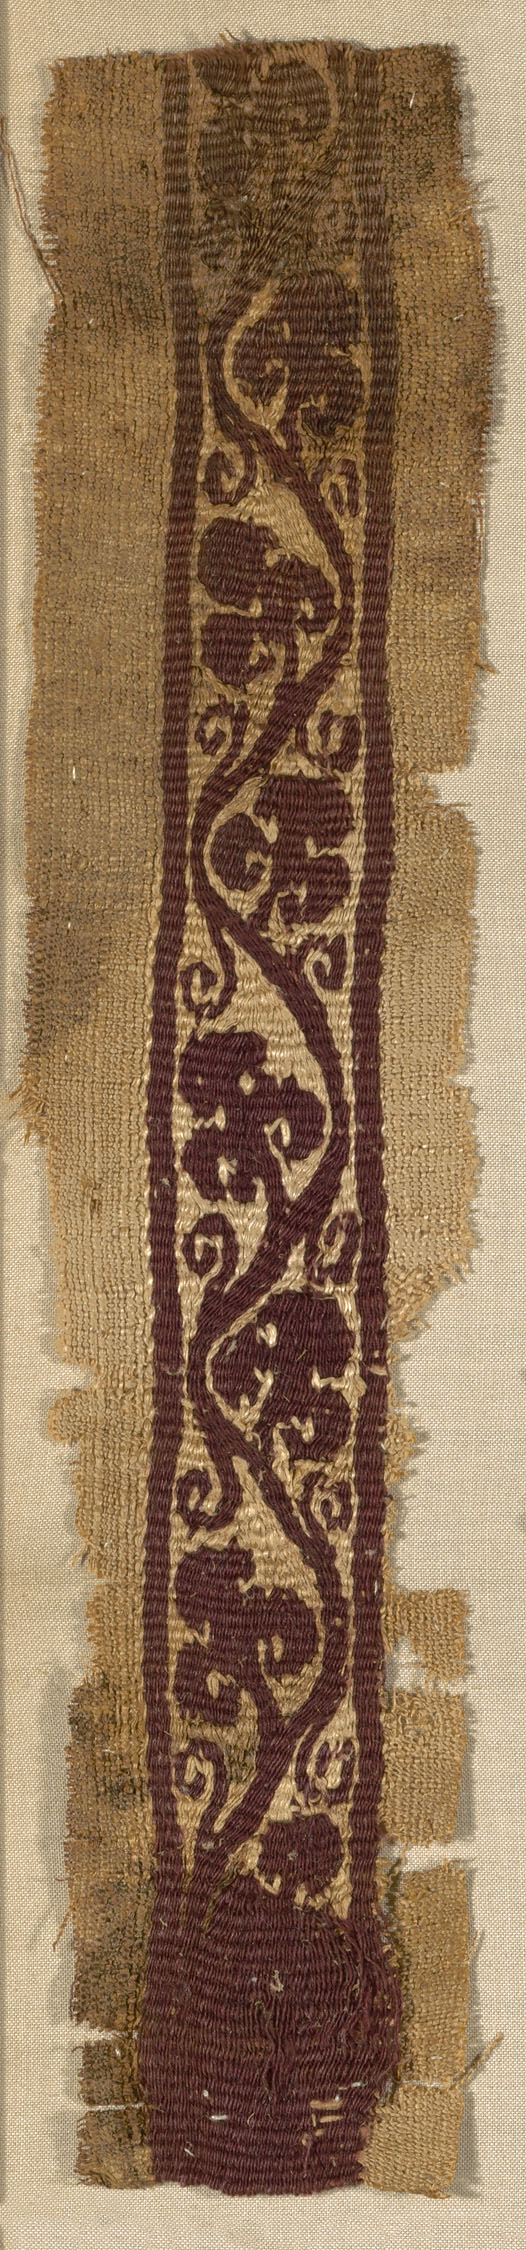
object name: Textile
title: Fragment (Border)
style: greco-roman (egyptian)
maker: Coptic (Egypt)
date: Greco–Roman period (30 B.C.–641 A.D.), 4th/5th century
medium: Linen and wool, slit tapestry weave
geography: Egypt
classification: textile; weaving